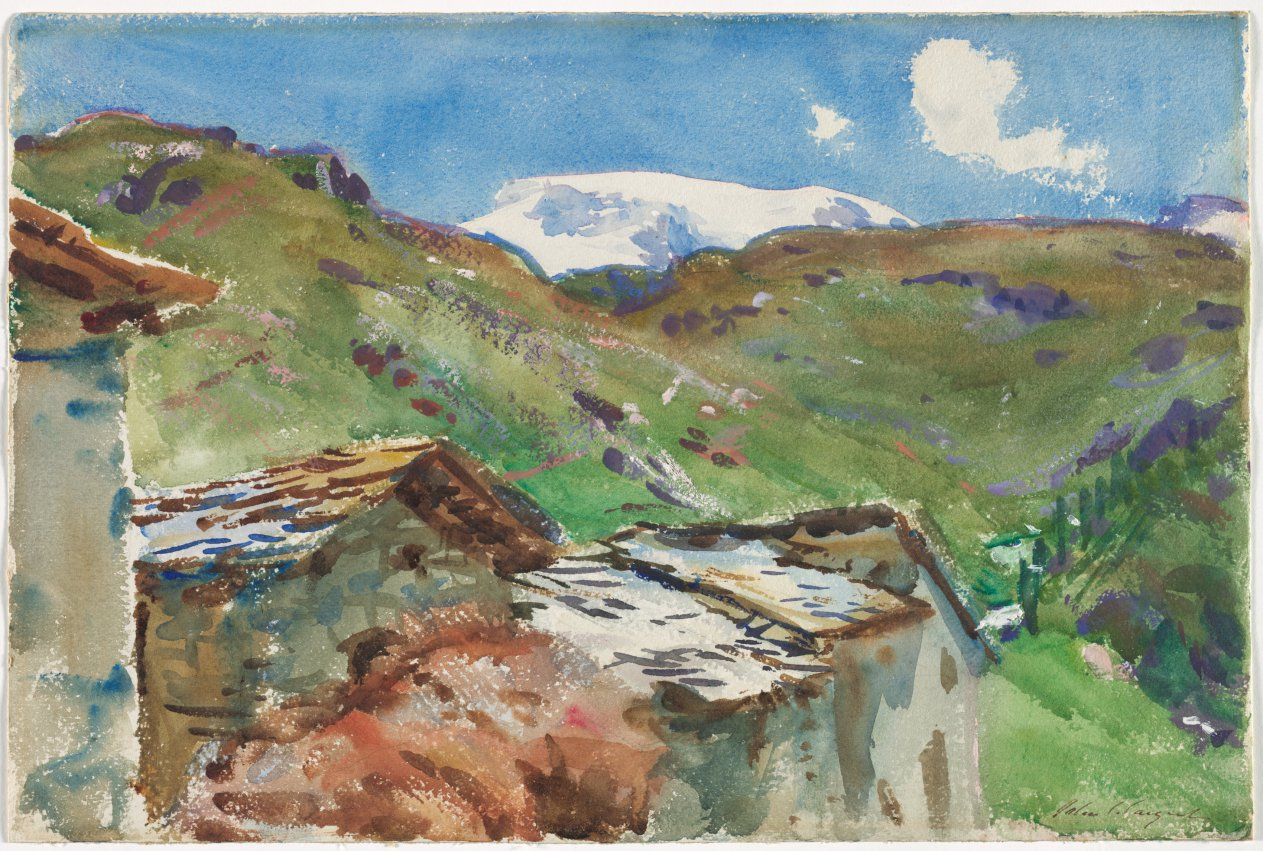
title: In Austrian Tyrol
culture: America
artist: John Singer Sargent (American, born Italy, 1856–1925)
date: 1911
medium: watercolor with traces of graphite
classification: Drawing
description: Although Sargent’s career was defined by his portraits of high-society patrons, privately he painted landscapes in watercolor and oil throughout his career. After the turn of the century, assured of his reputation, Sargent produced more landscapes than any other kind of painting. Alpine views were among his favorite subjects, but he avoided associating them with the rhetoric of the sublime. Instead, mountain views such as In Austrian Tyrol were closely cropped, often rendered from a low vantage point. The visual relationship between the shapes of the foreground rocks and the mountains themselves was what captured his attention.